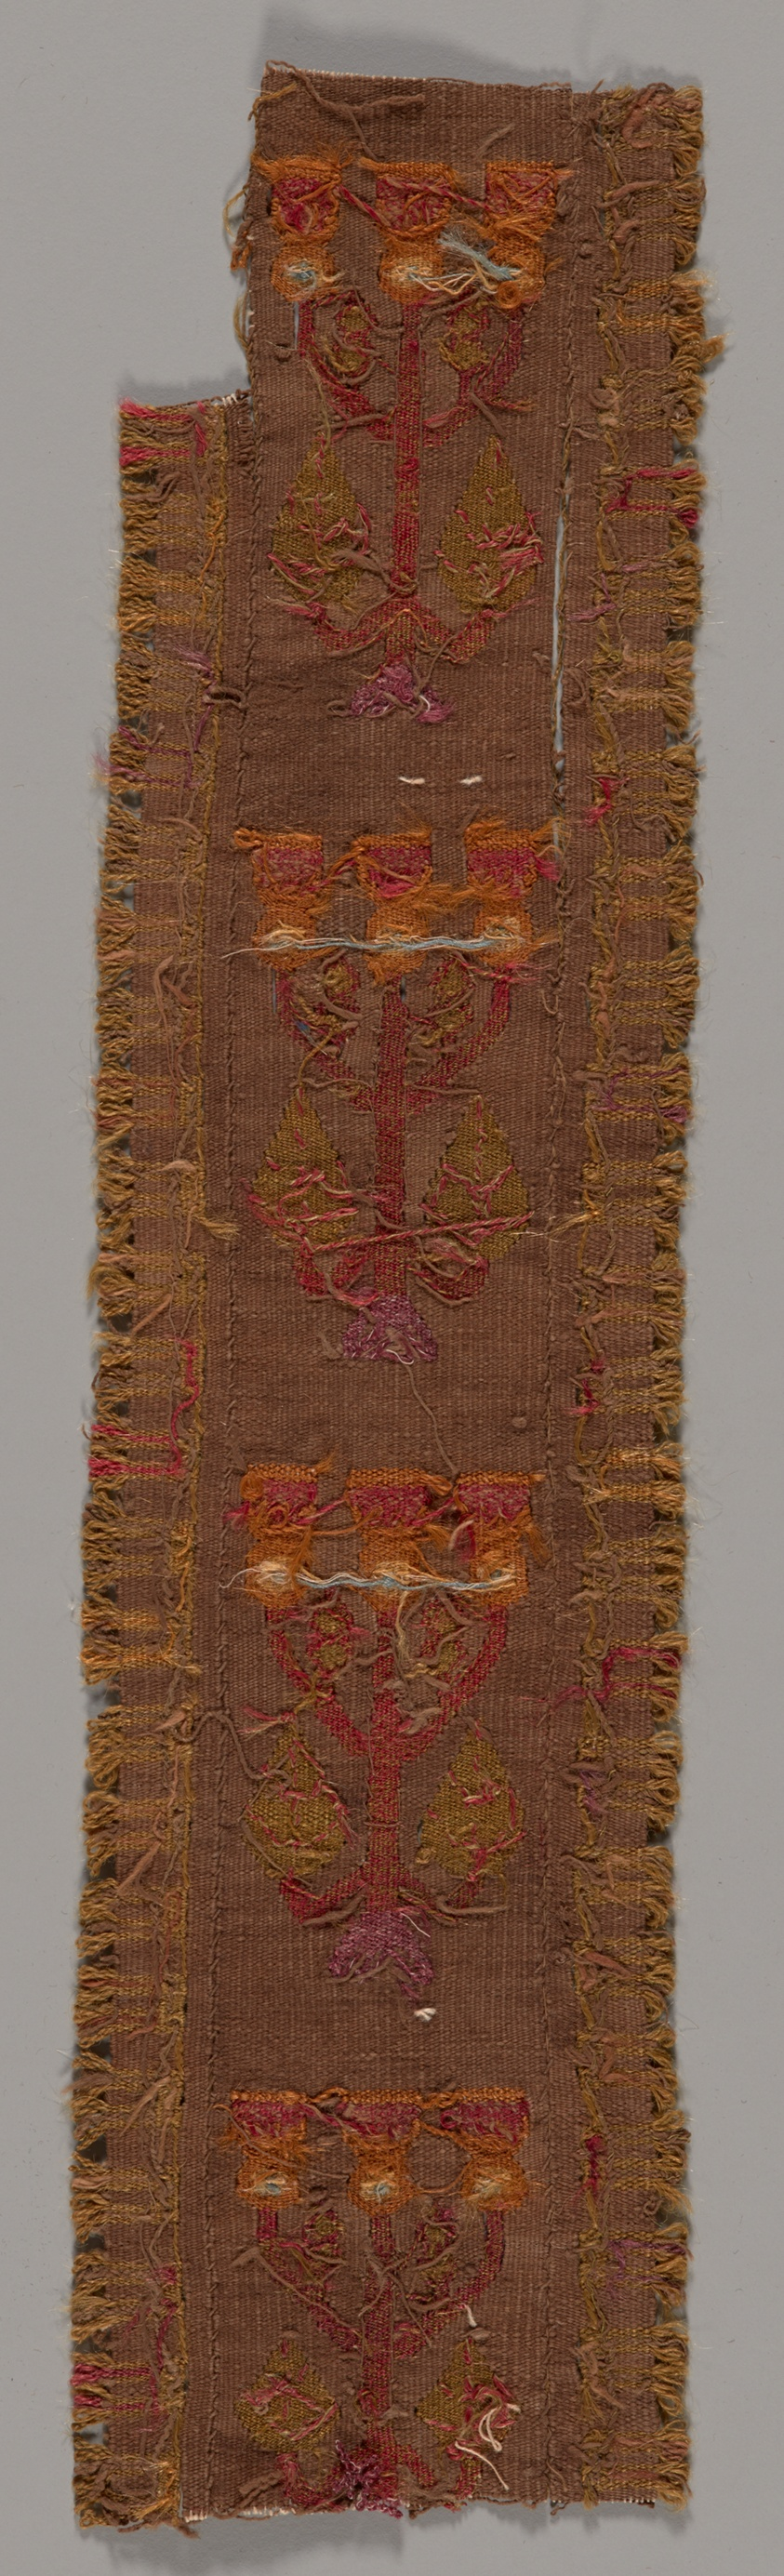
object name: Textile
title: Band Fragments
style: lambayeque, Pre-Columbian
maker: Lambayeque (North coast, Peru)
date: 1000/1476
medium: Cotton and wool (camelid), slit tapestry weave with eccentric wefts, uncut weft loop pile, extended uncut looped and plied weft fringes; embroidered with cotton and wool (camelid) with laid-in couching; and selvage weft loop fringe; three segments joined by overcast couching stitch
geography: Peru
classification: textile; weaving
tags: super/natural